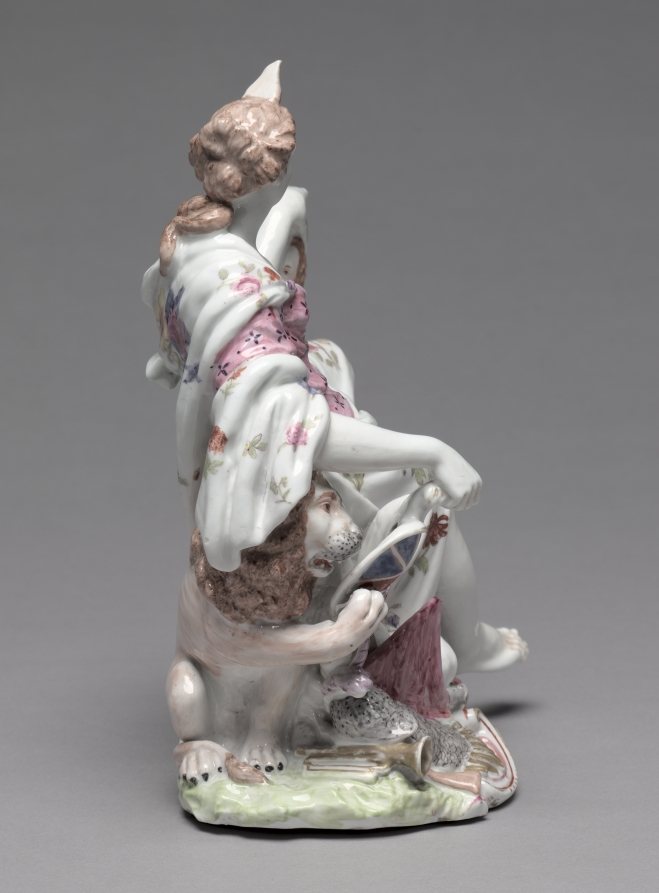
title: Figure of Britannia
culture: England, Staffordshire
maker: Longton Hall Porcelain Factory (British, Staffordshire, 1749–60)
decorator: Vauxhall Porcelain Factory (British, 1751–1764)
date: c. 1756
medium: soft-paste porcelain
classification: Ceramic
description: In this depiction of Britannia, the figure is surrounded by symbols of England’s power and military might. On one side, she and a lion, another symbol of Britain, support a shield adorned with the Union flag. Below it lay motifs associated with war such as armor, a trumpet, and a flag. On her left, Britannia presents a medallion to the viewer as she rests her feet on a globe, a symbol of the nation’s territorial aspirations. The portrait may depict the reigning king, George II (1683–1760), or Prince Frederick Louis (1707–1751), his recently deceased heir.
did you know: The creation of this triumphant personification of the nation was likely spurred on by Great Britain’s conflict with France in the Seven Years’ War (1756–63).